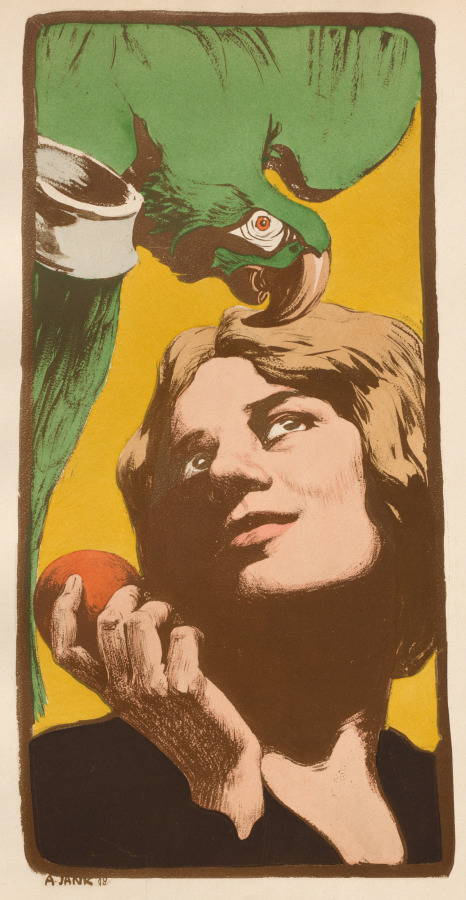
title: La Femme au Perroquet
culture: France, Paris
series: L'Estampe Moderne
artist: Angelo Jank (German, 1868–1940)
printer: Imprimerie Champenois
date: 1898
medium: Color lithograph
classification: Bound Volume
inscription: In plate: lower margin of image: A. JANK 98; lower right corner of sheet: blindstamp of l'Estampe Moderne (Lugt 2790)